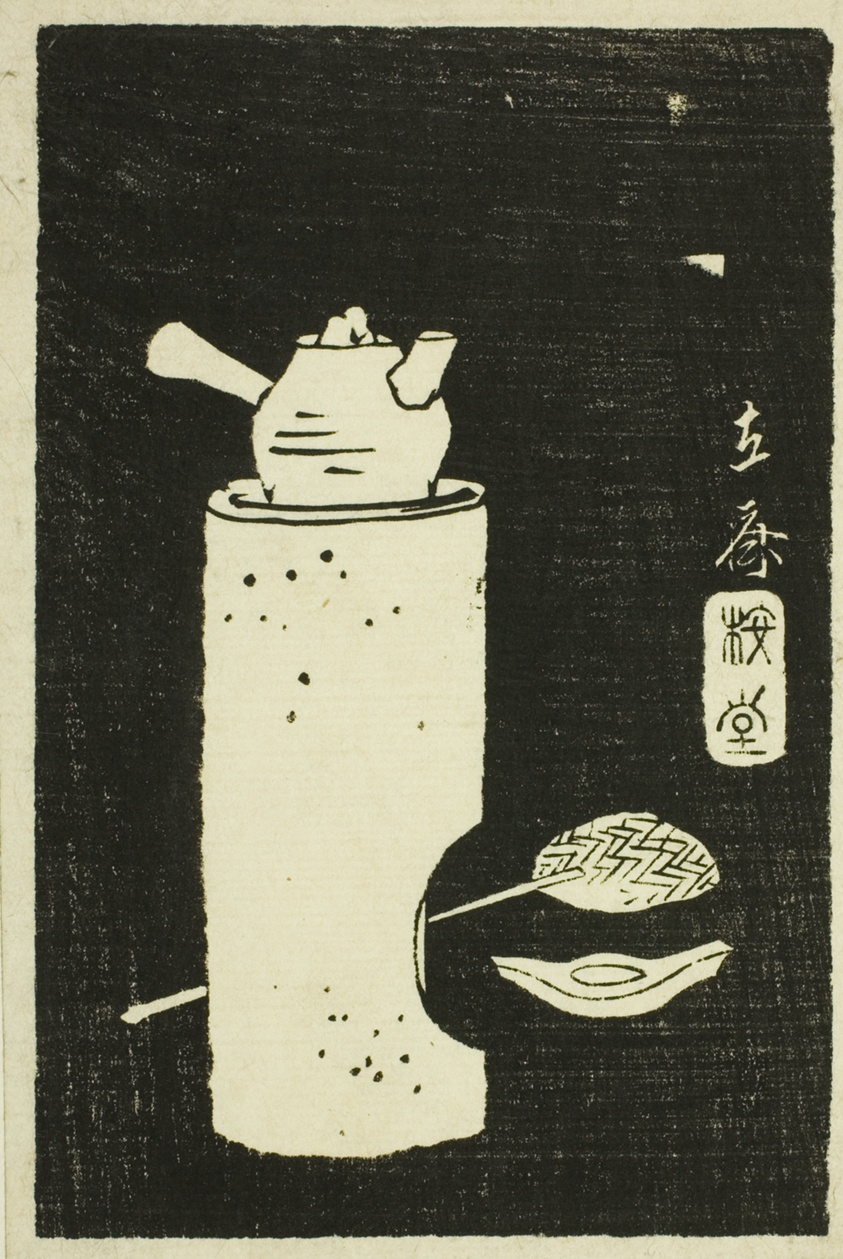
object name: Print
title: Tea Kettle, section of a sheet from the series "Mirror of Stone Rubbings of Views of the Provinces" (Kohon meihitsu ishizuri kagami)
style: Japanese (culture or style)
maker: Utagawa Hiroshige 歌川 広重; Japanese, 1797-1858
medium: Woodblock print; ishizuri-e, section of harimaze sheet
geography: Japan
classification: woodblock print; print; asian art; woodblock